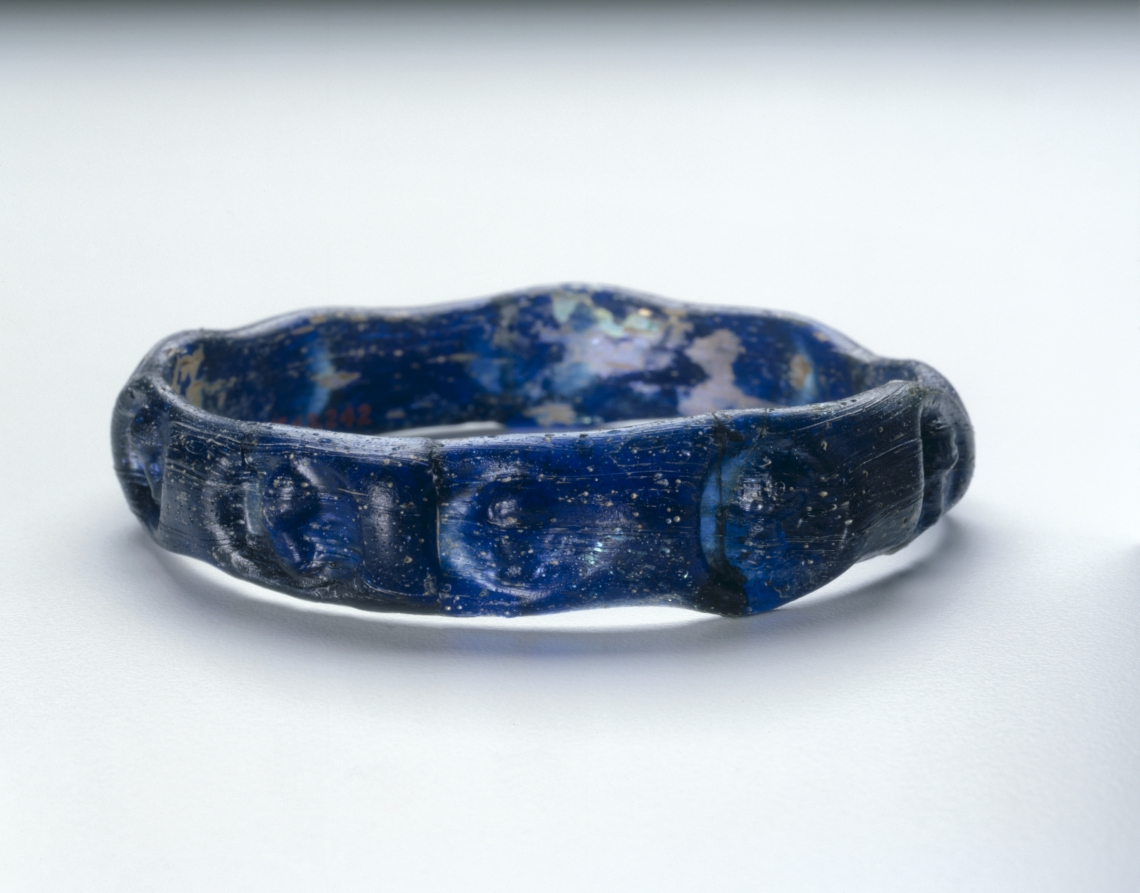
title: Bracelet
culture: Syria, Roman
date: 350–500 CE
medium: glass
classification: Glass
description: Jewelry made entirely of glass, such as this bracelet, held wide appeal in Roman society because of its potential to imitate more precious materials. The adaptability of glass offered an affordable alternative to the expensive items favored by the aristocracy, enabling less affluent Romans to follow imperial tastes.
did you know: The design on this bracelet was made by pressing a mold against the glass while it was still hot.